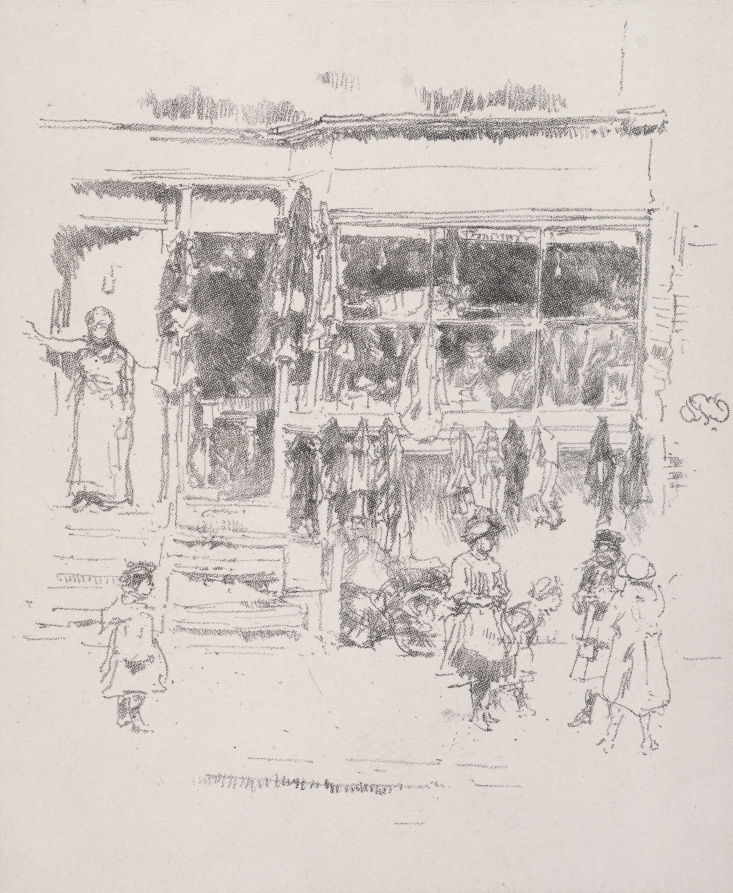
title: Chelsea Rags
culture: America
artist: James McNeill Whistler (American, 1834–1903)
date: 1888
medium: lithograph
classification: Print